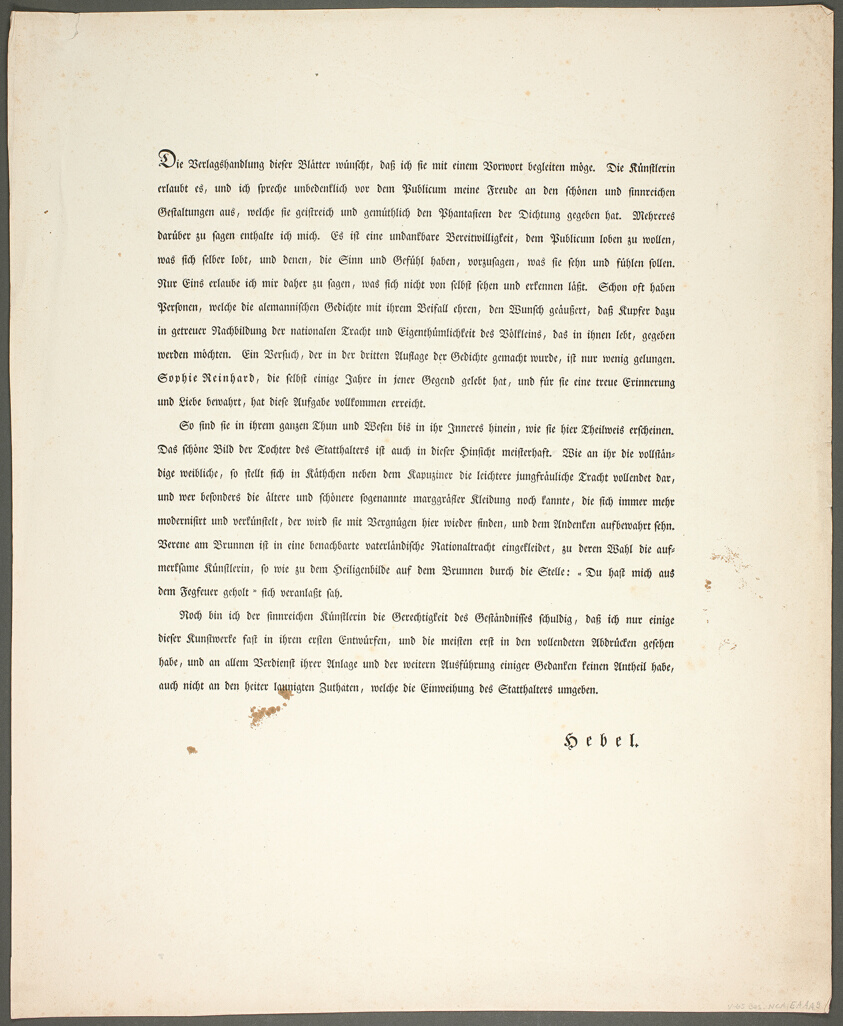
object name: Print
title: Introduction Page, from the series Poems in the Dialect of the Upper Rhine Region (Zehn Blätter Zu Hebels Alemannischen Gedichten)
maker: Published by Mohr und Winter; Accompanies series of prints by Sophie Reinhard (German, 1777-1843) published by Mohr und Winter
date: 1820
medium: Etching on cream wove paper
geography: Germany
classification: etching; print; prints and drawing